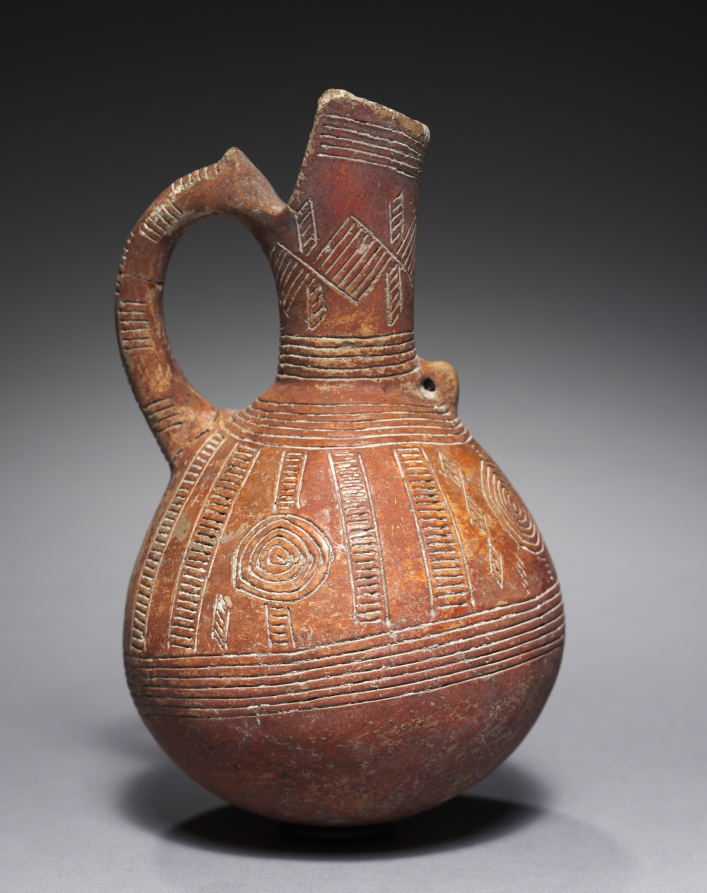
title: Jug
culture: Cyprus, Alambra or Ayia Paraskeve, early Cypriot III-middle Cypriot I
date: c. 2000–1800 BCE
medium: red ware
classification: Ceramic